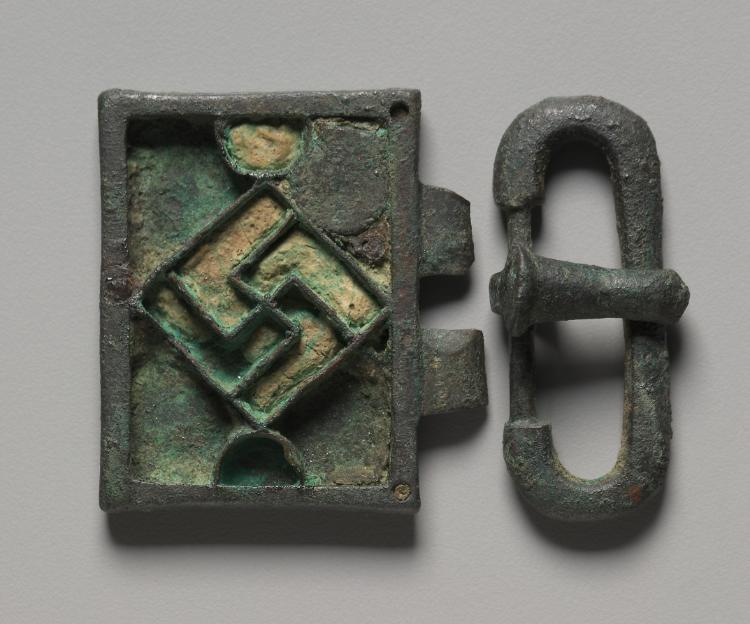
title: Buckle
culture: Ostrogothic(?), Migration period, 6th century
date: 500s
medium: bronze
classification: Jewelry